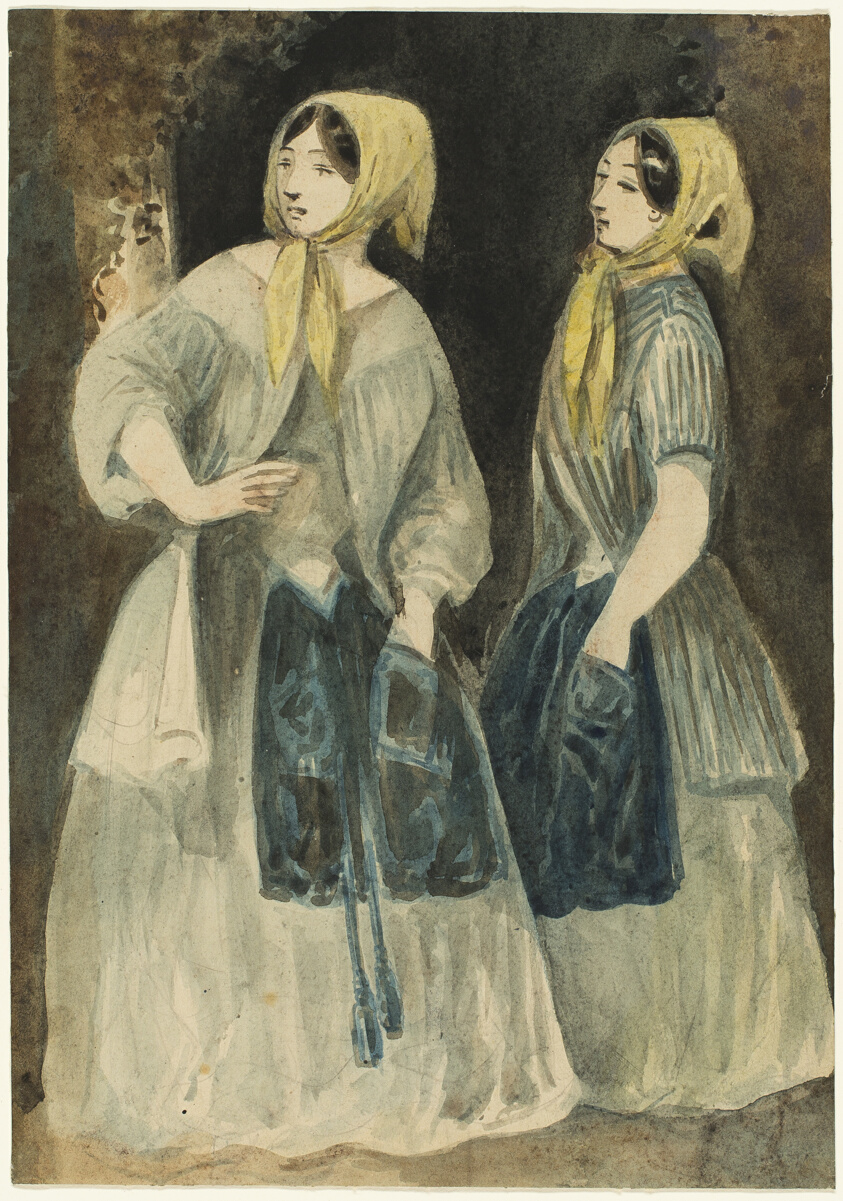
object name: Drawing and Watercolor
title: Two Women in Yellow Kerchiefs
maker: Constantin Guys (French, 1802-1892)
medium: Brush and watercolor, over traces of graphite, on ivory wove paper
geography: France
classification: watercolor; drawings (visual works); prints and drawing